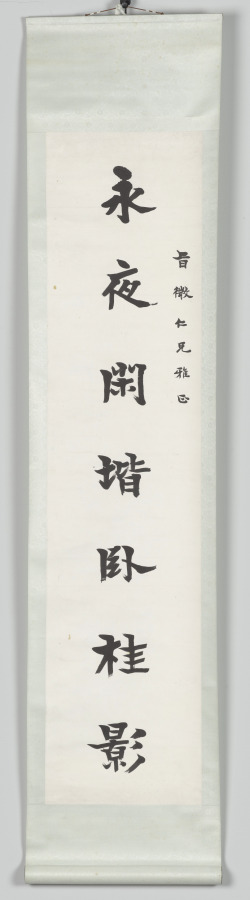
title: Right Scroll from Calligraphy Couplet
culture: China, Republican period (1912-49)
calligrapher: Liang Qichao (Chinese, 1873–1929)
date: after 1911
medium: One of a pair of hanging scrolls; ink on paper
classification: Calligraphy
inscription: 永夜鬧皆臥桂影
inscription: 旨徽仁兄雅心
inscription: 清晨簾幕卷輕霜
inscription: 梁啟超筆宋詞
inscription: [印] 新會梁氏. [印] 啓超和印.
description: The prominent politician and modern reformer Liang Qichao writes here in an angular, firm, and little modulated regular script style, inspired by inscriptions incised on ancient stone steles. Those script styles were popular among reformers of the time, as they sought to revive the ancient culture and built a new China on the country’s strong ancient foundations. Each scroll cites the verse of a historic cultural figure in Chinese history.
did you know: Liang Qichao aimed to reform the country and strengthen its foundations through the revival of the ancient culture of China.